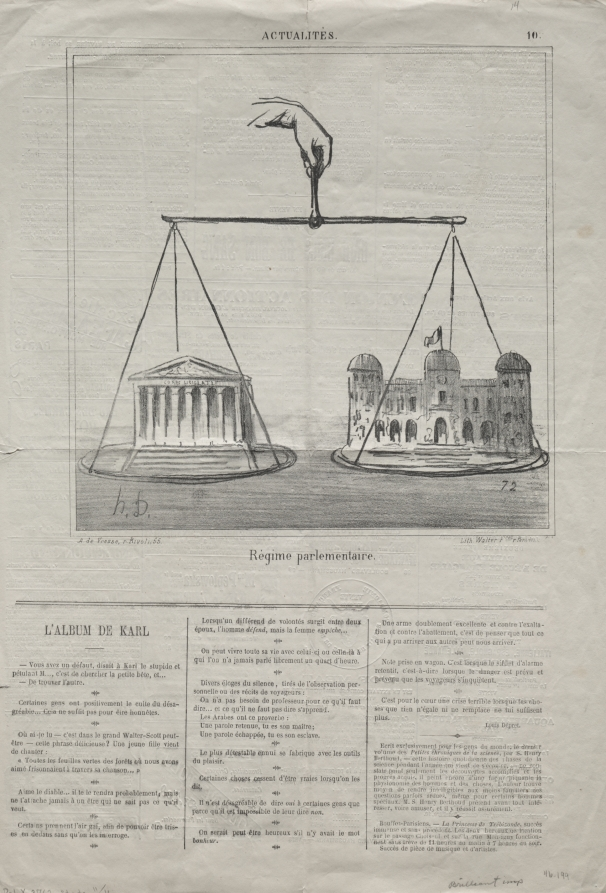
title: Parliamentary Regime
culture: France, 19th century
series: News of the Day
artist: Honoré Daumier (French, 1808–1879)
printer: Walter Frères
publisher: Arnaud de Vresse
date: 1870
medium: lithograph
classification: Print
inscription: Lower margin, printed: A. de Vresse, r. Rivoli, 55. / Lith. Walter Fres. r. Paradis Pre? ; Upper margin, pencil: 14 ; Lower margin, pencil: Del. X. 3762, state II/II / Brilliant imp 46.199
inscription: Above image, printed: ACTUALITÉS. / 10 ; Below image, printed: Régime parlementaire.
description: This print was published in Le Charivari (February 1, 1870) as plate 10 from the series News of the Day.